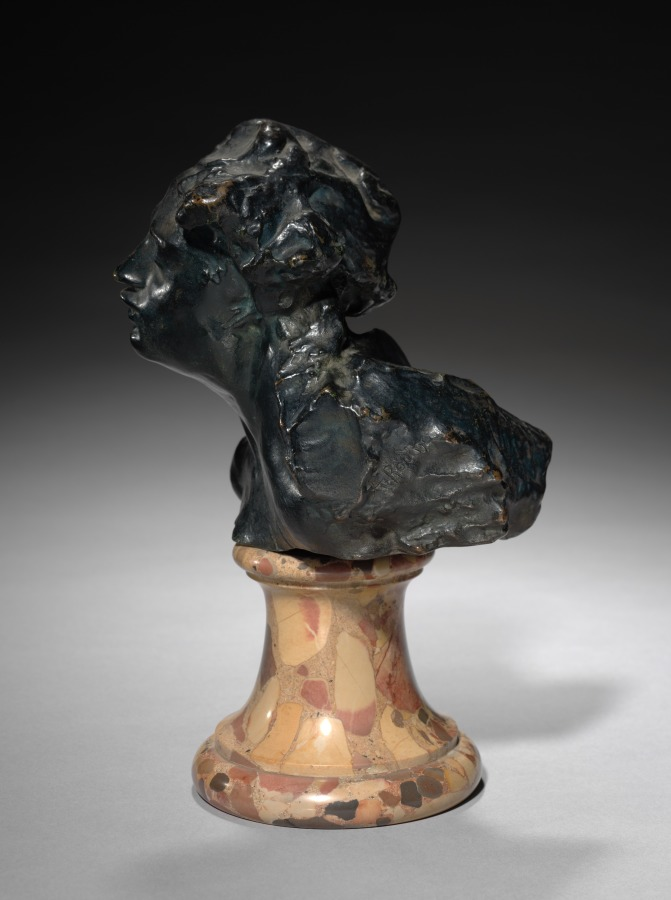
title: Head of the Little Martyr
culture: France, late 19th-early 20th century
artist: Auguste Rodin (French, 1840–1917)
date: c. 1880 – 1885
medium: bronze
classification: Sculpture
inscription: Signed sinister side: "A. Rodin"; inside front in relief: "A. Rodin"